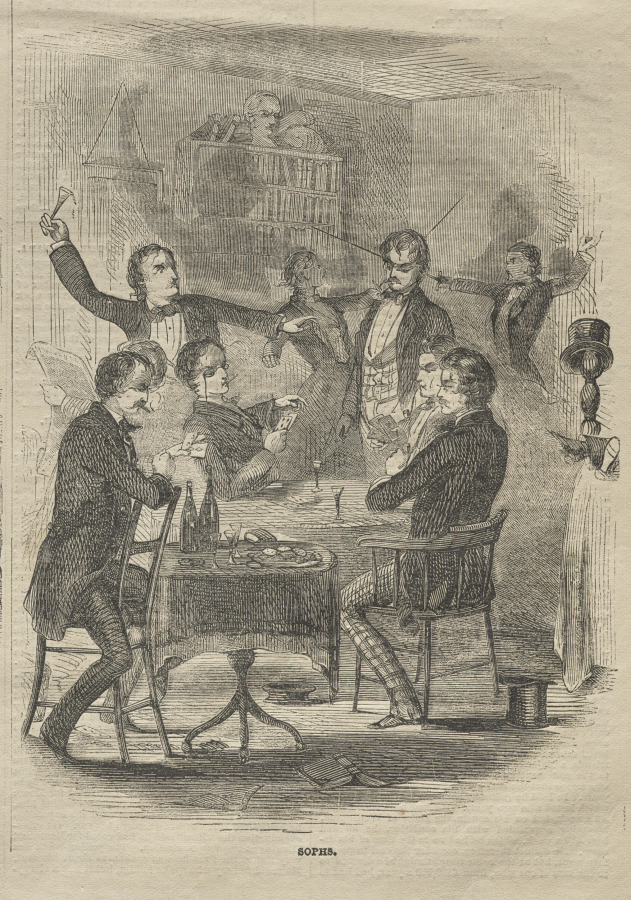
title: Sophs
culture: America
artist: Winslow Homer (American, 1836–1910)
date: 1857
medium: wood engraving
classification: Print